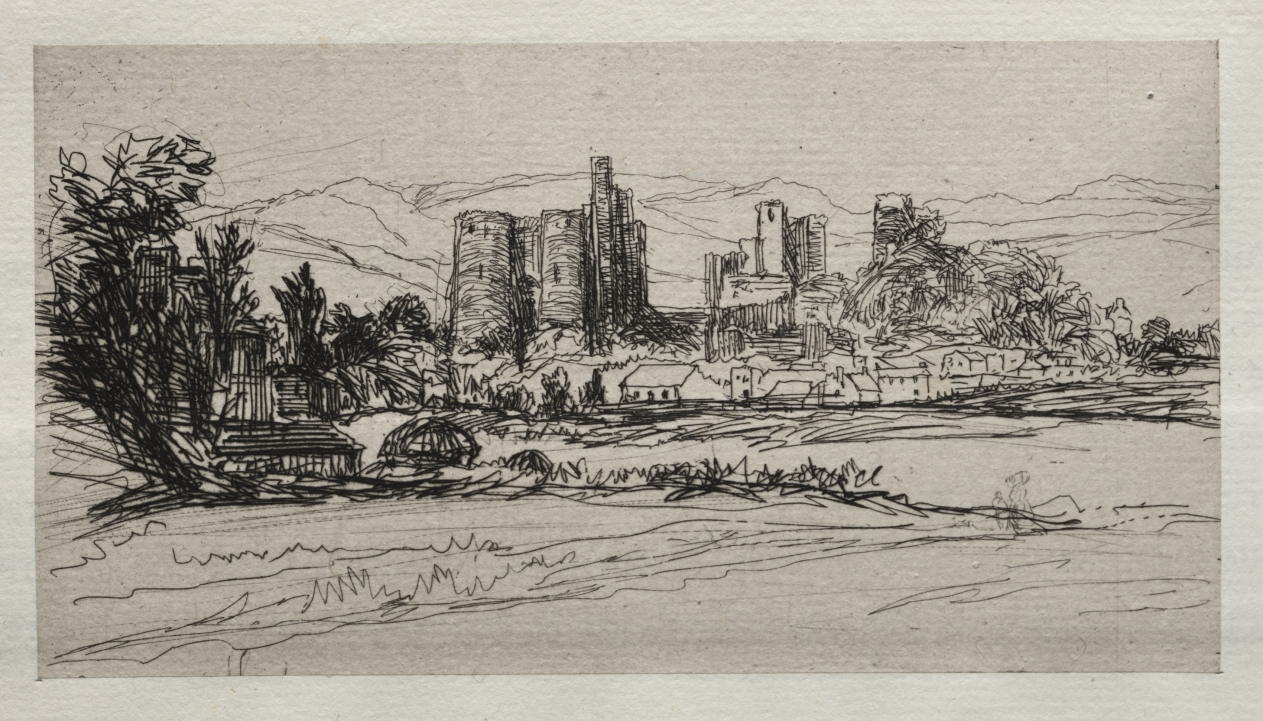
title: Kidwelly Castle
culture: England, 19th century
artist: Francis Seymour Haden (British, 1818–1910)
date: 1859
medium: etching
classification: Print